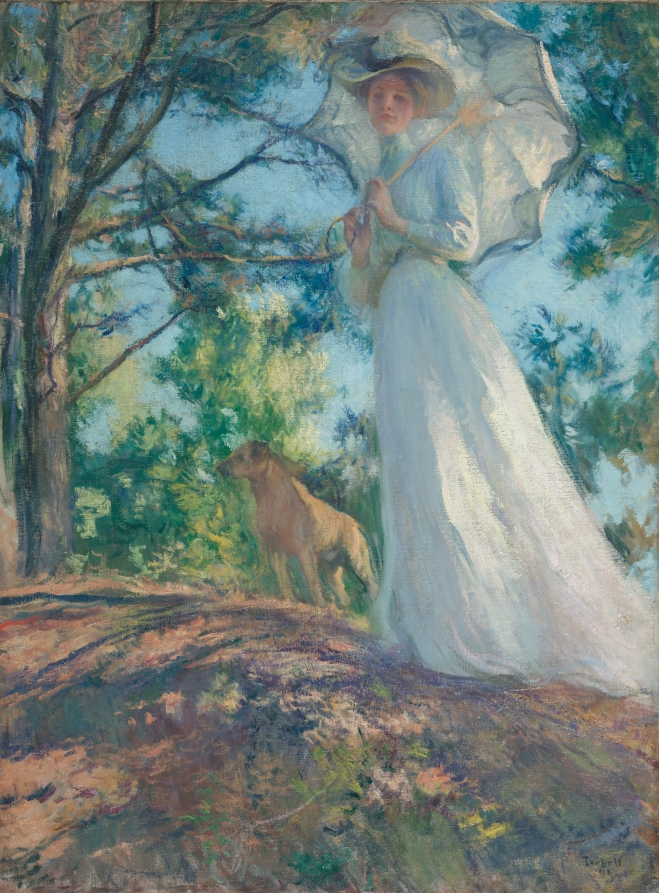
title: On Bos'n's Hill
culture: America, early 20th Century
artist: Edmund C. Tarbell (American, 1862–1938)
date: 1901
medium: oil on canvas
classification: Painting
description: Located in New Castle, New Hampshire, Bos’n’s Hill was a favored leisure spot for Tarbell’s family, which included four children. It provides the luminous setting for this depiction of the artist’s wife, Emeline, who strolls through the landscape with a parasol to protect her from the sun, while a beloved pet dog accompanies her. Four years later, the couple purchased a summer house nearby.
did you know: The artist was a popular art professor in Boston, and his followers were nicknamed "Tarbellites."